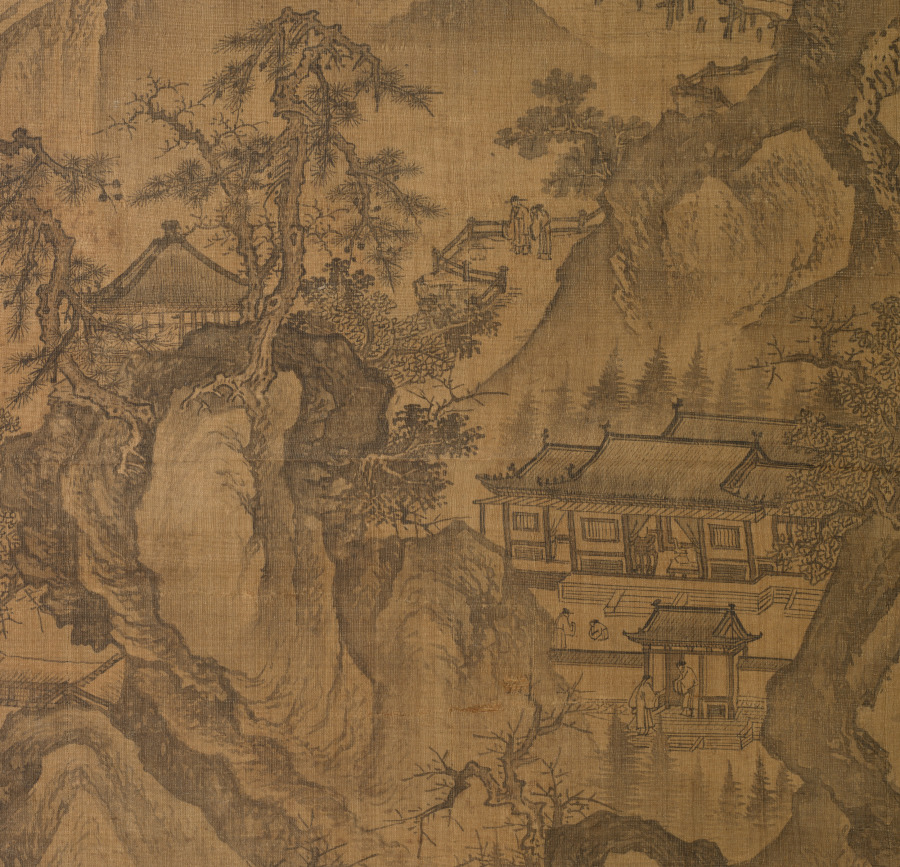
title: Mountain Market, Clear with Rising Mist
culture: Korea, Joseon dynasty (1392–1910)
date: early 1500s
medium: Hanging scroll; ink on silk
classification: Painting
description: This painting depicts several vignettes of the scholar-hermit’s various activities. In the lower left corner, the scholar-hermit is portrayed welcoming his guest in the courtyard. In the middle section on the lower bottom, the scholar and his guest are shown encountering another traveler on the bridge and exchanging their greetings. After crossing the bridge, the scholar visits a friend who lives in a compound of multiple buildings. The two friends decide to take a short walk. Both appear in a terraced cliff, enjoying a mountain vista and the fragrance of an old pine tree carried by the gentle wind. The scholar continues his journey with his two servants. They are portrayed crossing a winding wooden bridge. Right beyond the colossal rocky mountain, a panoramic view to a bustling market place unfolds, suggesting that it may be the place where the scholar-hermit’s entourage would visit. Perhaps the scholar need to buy items such as books, rolls of papers, and brushes, all essential to scholarly life. Toward the upper left corner, another group of travelers is landing on the river bank that leads to the city gate; they may be headed to the multistoried Buddhist stupa nestled on the top of the mountains.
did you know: Due to its stylistic features, this painting has long been believed to be a Chinese painting of the Northern Song period, dated to the 12th century.